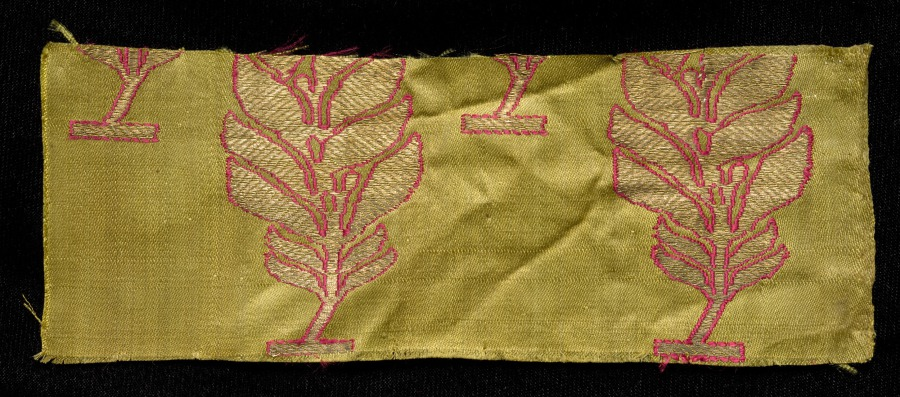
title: Brocade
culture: India, Benares ?, 19th century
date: 1800s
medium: brocade, "kimkhwab"; silk and gold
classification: Textile